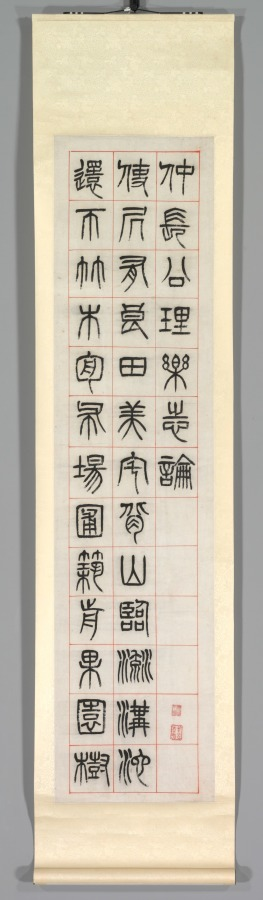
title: On Happiness, Calligraphy in Seal Script Style (zhuanshu)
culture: China, Changsu, Qing dynasty (1644-1911)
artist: Yang Yisun (Chinese, 1813–1881)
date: 1871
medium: hanging scroll, ink on paper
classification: Painting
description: Yang Yisun transcribed this ancient text on six narrow scrolls, starting at the top right and ending at the bottom left. Yang emphasizes the text’s historic nature by using the seal script style found on stone steles and bronze vessels. On Happiness features reflections of a scholar on a leisurely life in the countryside, composed by Han dynasty official Zhongchang Tong, who died the year the Han dynasty collapsed (AD 220). The idyllic life described in the text may bean evocation of the past in a time of national crisis. A decade before Yang wrote these scrolls, Anglo- French forces had looted and burned the Summer Palace in Beijing. At the same time, the domestic Taiping rebellion (1850–64), led by a religious fanatic to overthrow the Qing government, had devastated Yang’s homeland, the Jiangnan region, with an estimated 20 million lives lost.